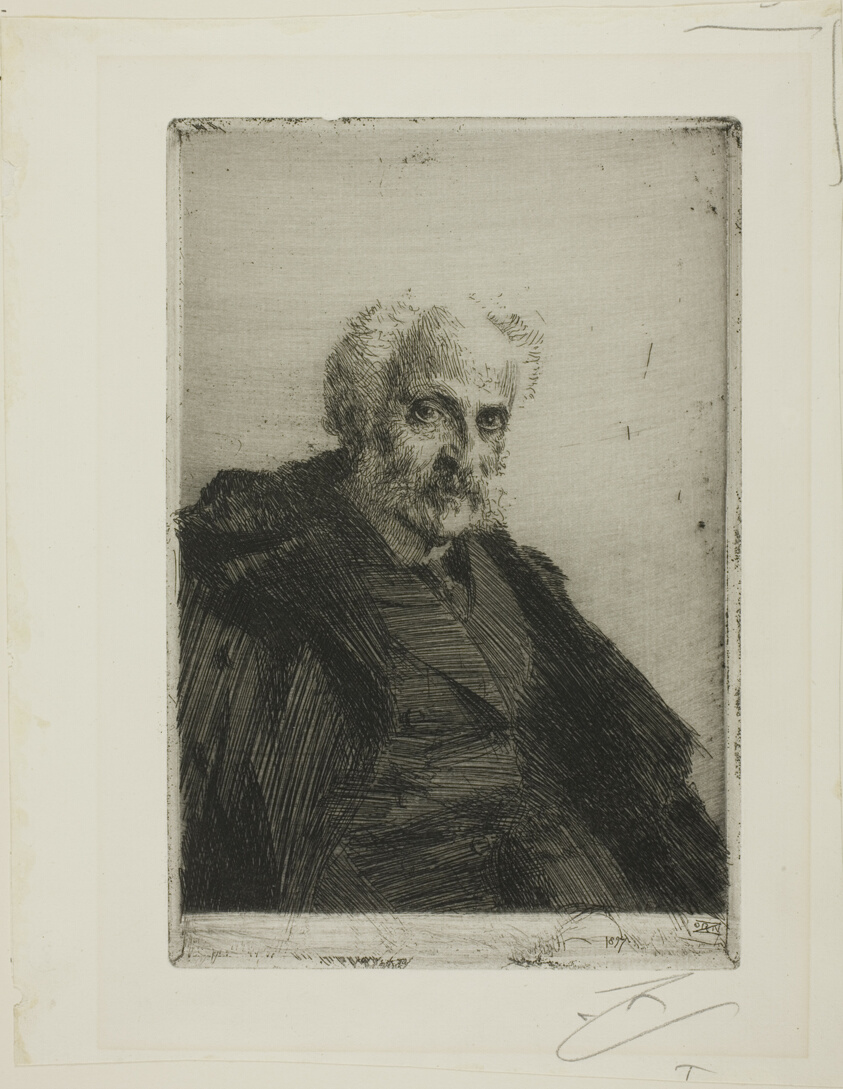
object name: Print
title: S. Loeb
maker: Anders Zorn (Swedish, 1860-1920)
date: 1897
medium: Etching on ivory laid paper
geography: Sweden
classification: etching; print; prints and drawing